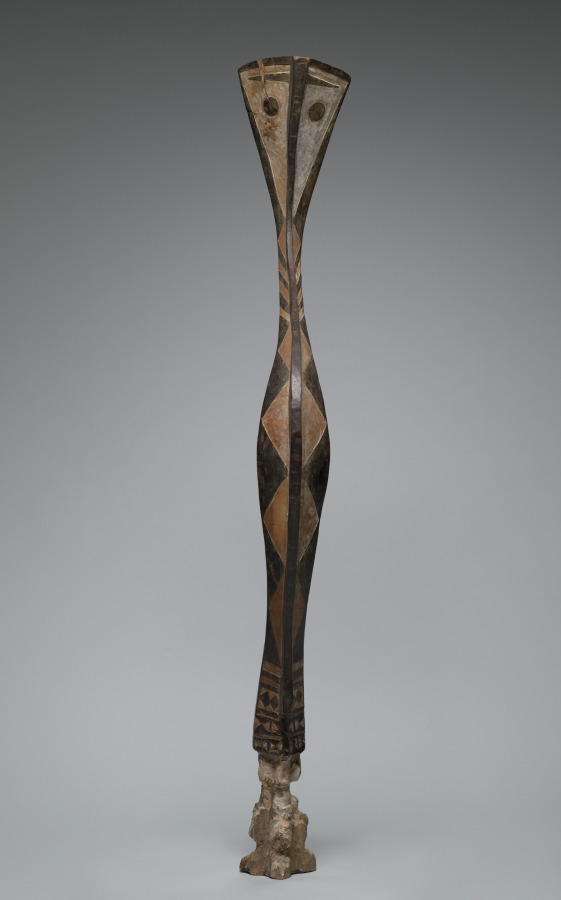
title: Serpent Headdress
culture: Africa, West Africa, Guinea, possibly Baga-style maker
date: late 1800s–early 1900s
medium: Wood (Nauclea pobeguinii) and paint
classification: Mask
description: Traditionally, Baga society was ruled by village councils of elders who derived their power from their direct contact with spirit entities through lifelong initiation rituals and the accumulation of secret knowledge. Two different religious orders controlled initiations, providing the context for much Baga art. One was identified as female, the other as male, though only men belonged to both groups. Initiations in each order followed three stages, culminating in the revelation of the highest spirit being. This type of Baga headdress embodied the serpent spirit Ninkinanka, honored for giving rain, bestowing riches, and bringing forth children. The serpent figure would be placed on top of a conical framework of palm branches carried on a male dancer’s head. It appeared at the end of the first level of the initiation for boys and girls or just before the circumcision at the beginning of the boys’ initiation.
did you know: In the context of boys' initiations, the serpent headdress was sometimes identified as the rainbow, which the Baga and their neighbors associate with beginnings and endings, life and death, and the continuation of lineages.